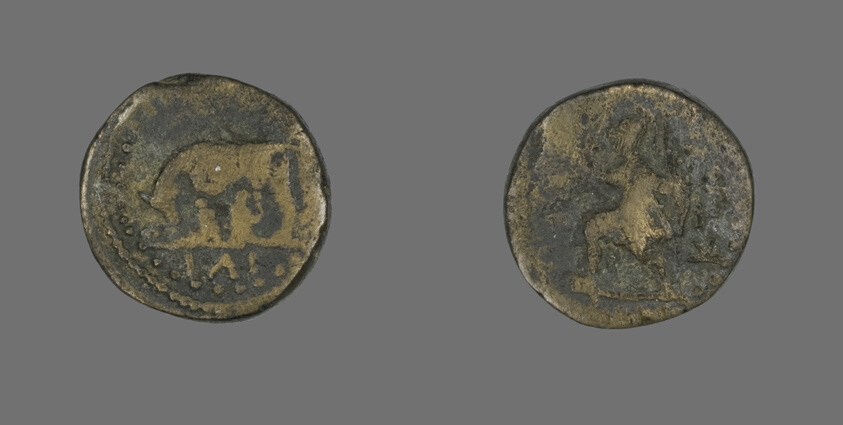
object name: Coin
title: Coin Depicting a She-Wolf Nursing Romulus and Remus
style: roman (ancient, style or period), ancient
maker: Roman; minted in Ilium, Troas (now Turkey)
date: 117-192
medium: Bronze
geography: Rome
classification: coin; ancient art